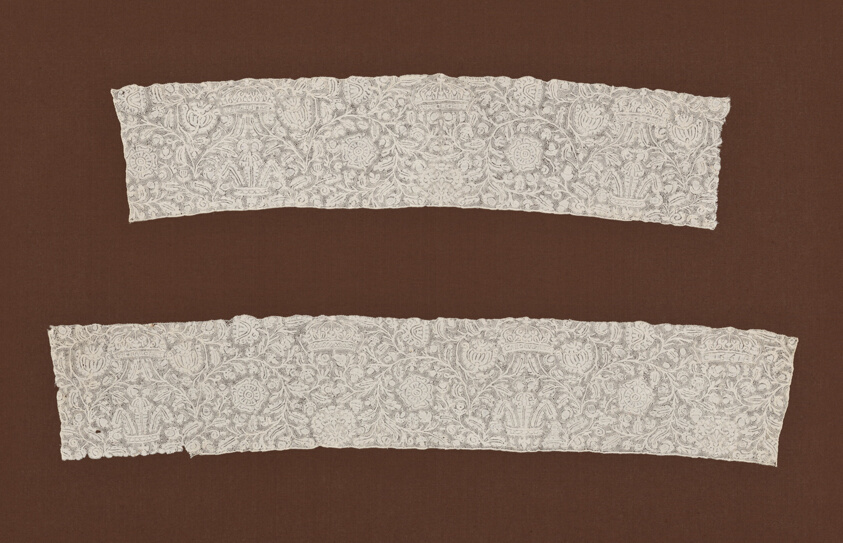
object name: Textile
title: Two Fragments from a Border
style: restoration (british), stuart, european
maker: England, Devonshire or Dorset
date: 1661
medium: Linen, bobbin part lace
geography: England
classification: textile; lace - bobbin; lace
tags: fashion